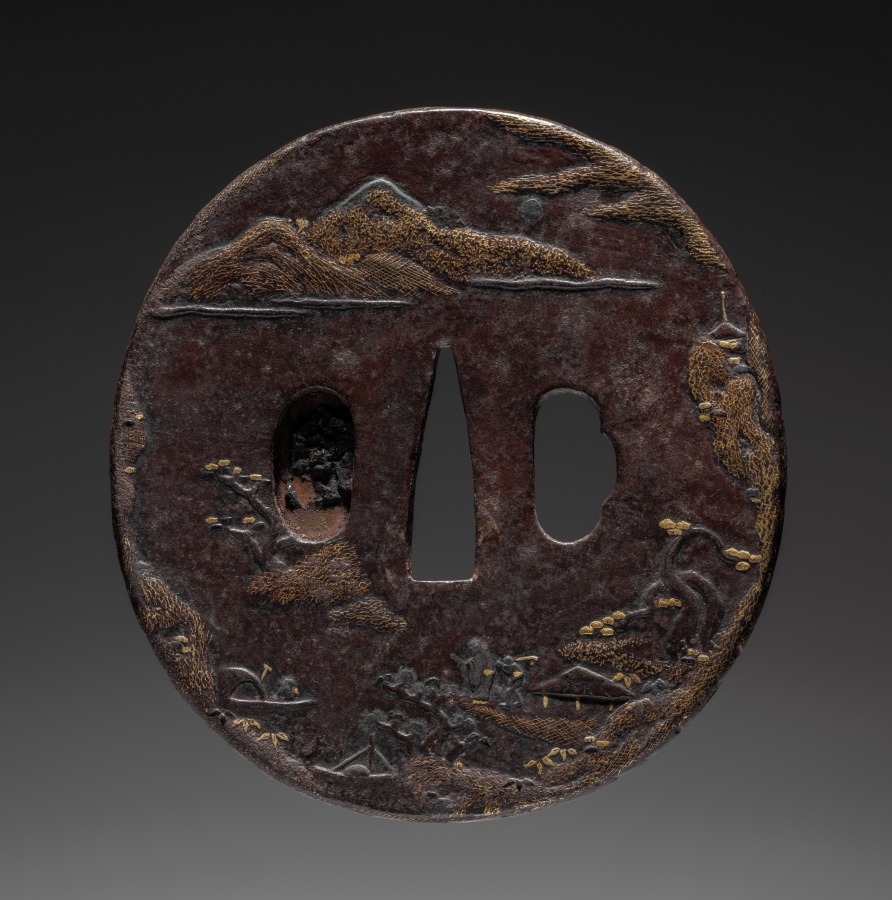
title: Sword Guard (Tsuba) with Chinese Landscape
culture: Japan, possibly Edo period (1615-1868)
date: c. 1615–1868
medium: iron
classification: Arms and Armor